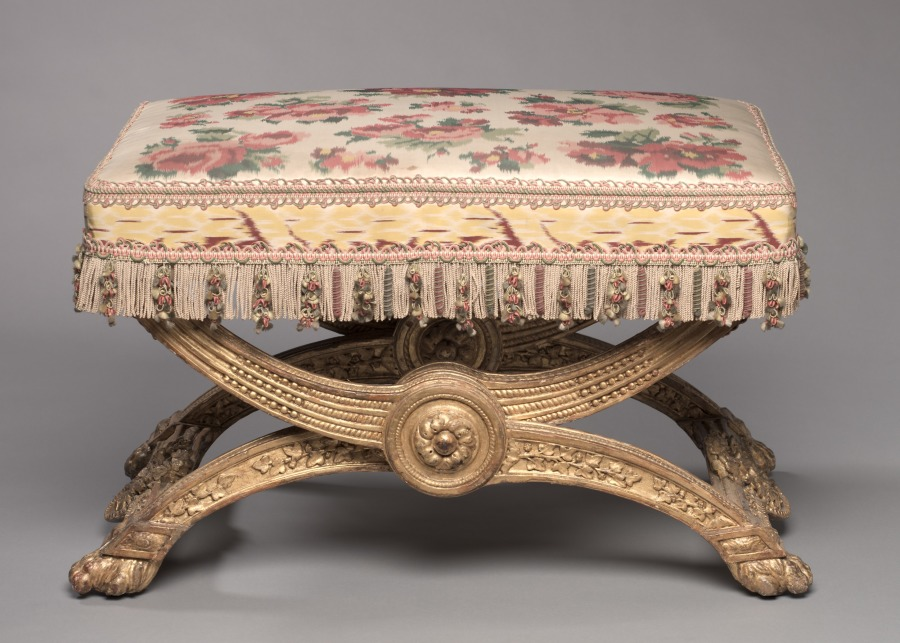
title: Stool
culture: France, 18th century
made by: Jean-Baptiste-Claude Sené (French, 1748–1803)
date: 1786–1787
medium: carved and gilded wood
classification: Furniture and woodwork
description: These stools were made for the gaming room of Marie-Antoinette at the Chateau de Compiègne and later placed in the Chateau de Fontainbleau.